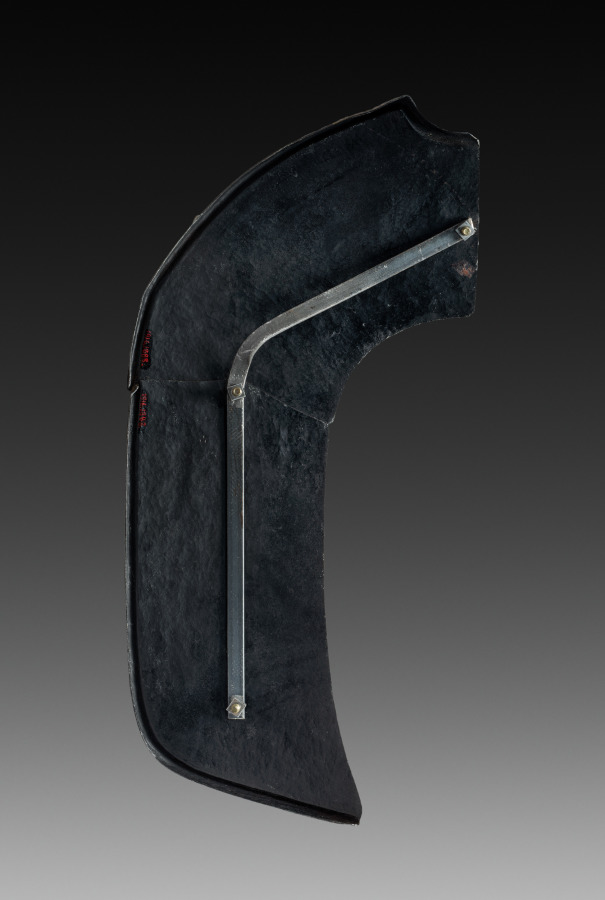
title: Pommel Plates from the Garniture of Rudolf II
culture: Germany, Augsburg, 16th century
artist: Anton Peffenhauser (German, 1525–1603)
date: c. 1571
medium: blued, etched, and gilded steel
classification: Arms and Armor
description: These plates, once part of a saddle, are from a tournament armor for man and horse made for the sons of Emperor Maximilian II, archdukes Rudolf and Ernst. Most of the remaining elements of this armor are still in the collections of the Imperial Armouries in Vienna. The decorative pattern (in the imperial colors of black and gold) forms elegant knots, with distinctive foliage and hop sprigs filling the loops.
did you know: Once part of a saddle, these plates protected the rider's thighs.